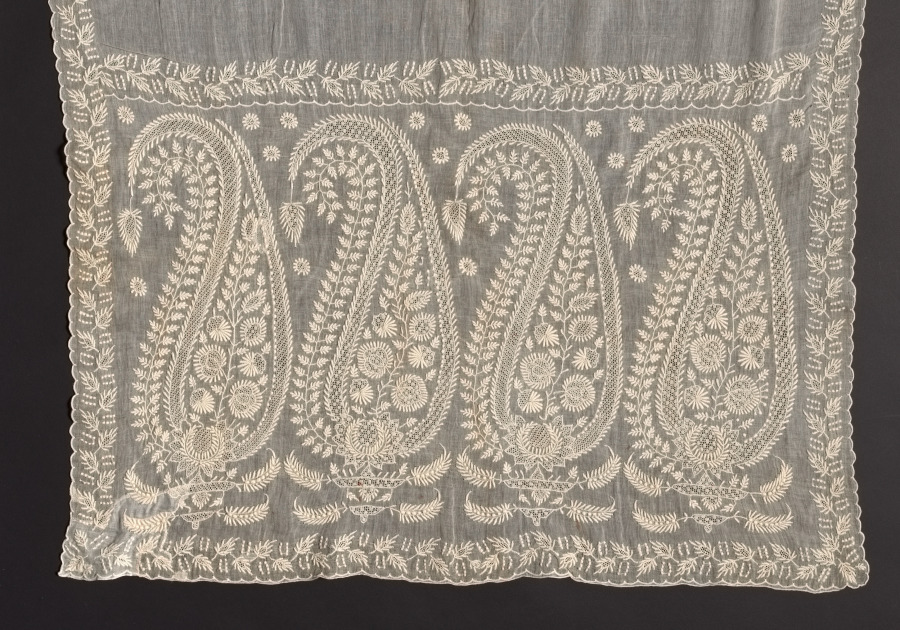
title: Embroidered Scarf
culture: Madeira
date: 1800–1820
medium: Plain weave cotton (est.): embroidered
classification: Embroidery